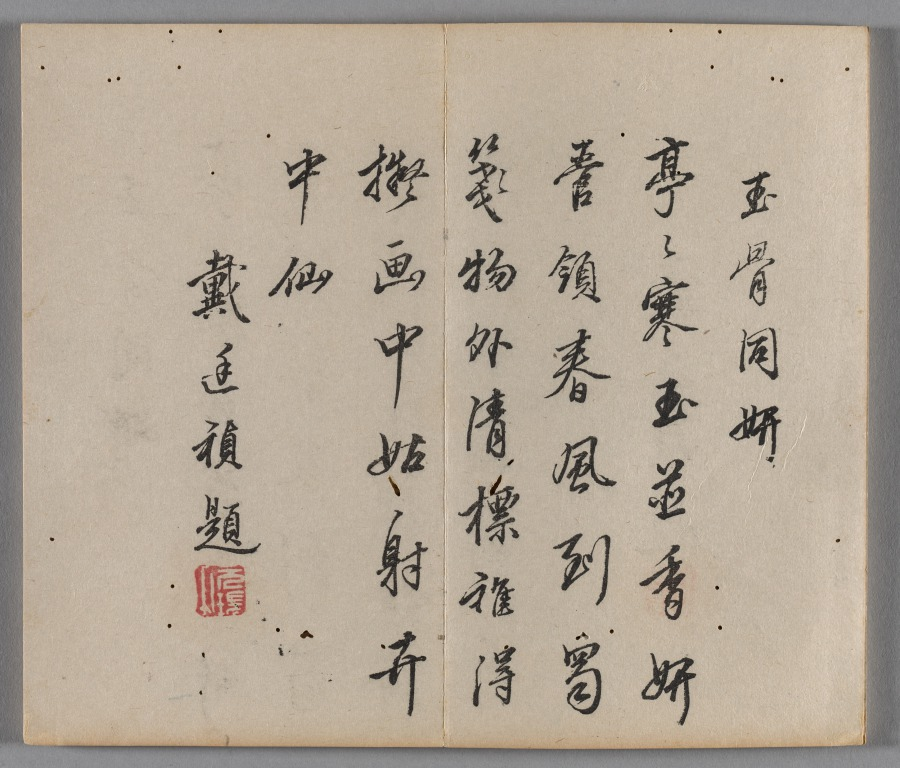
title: Ten Bamboo Studio Painting and Calligraphy Handbook (Shizhuzhai shuhua pu): Plum Blossoms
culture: China, Qing dynasty (1644-1911)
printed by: Hu Zhengyan (Chinese, c. 1584–1674)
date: 1633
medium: Woodblock-printed book; ink and colors on paper; first edition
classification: Print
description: Color printing reached a level of perfection in the early 1600s, as seen in this Ten Bamboo Studio Collection of Calligraphy and Painting and the Mustard Seed Garden Manual of Painting (printed 1679 and 1701). The painterly quality, precision in registering (aligning) the woodblocks, and harmonious colors made them the most successful color print editions in Chinese history. Both editions were printed and compiled in Nanjing, spread nationwide, and had a great impact on the arts in Japan and Korea.